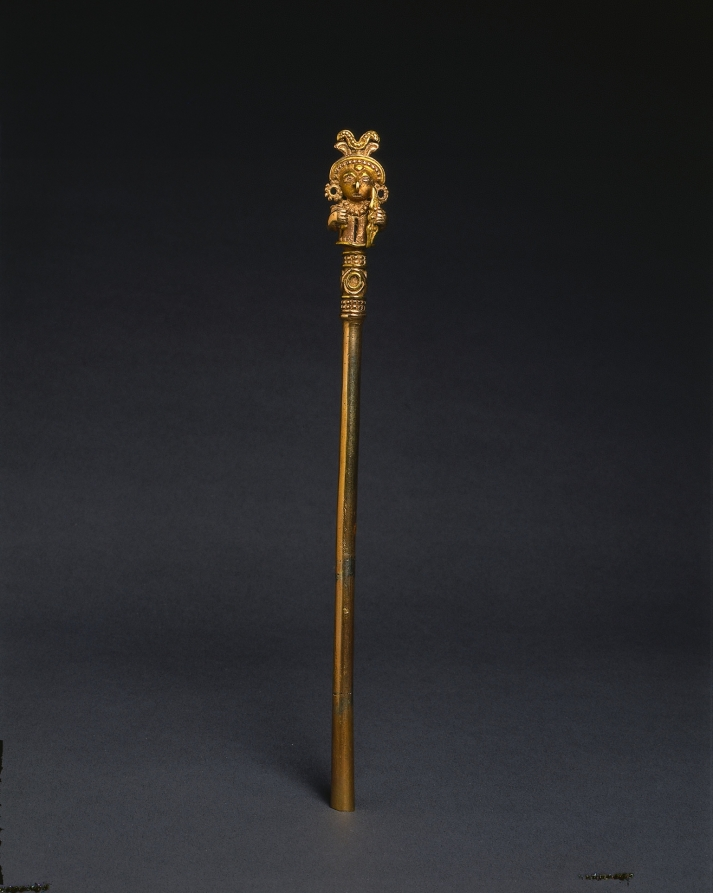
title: Lime Dipper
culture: Colombia, Calima region, Yotoco style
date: c. 1–800 CE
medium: gold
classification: Metalwork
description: Coca-leaf chewing was a widespread ritual in ancient South America. Utensils included a container and a dipper or spoon for powdered lime (made from seashells), added to the coca to enhance its gentle, stimulating effect. Colombian cultures are especially known for transforming these utensils into works of art made of precious metal. The image on the tallest dipper is wonderfully complex. A serpent coils at the bottom, beneath a snarling animal with a huge, vertical tail. This animal has a tiny monkey on its back; the monkey also has a huge tail, which rests on the first animal’s head like a headdress. This intricate image was created with the lost-wax casting process.